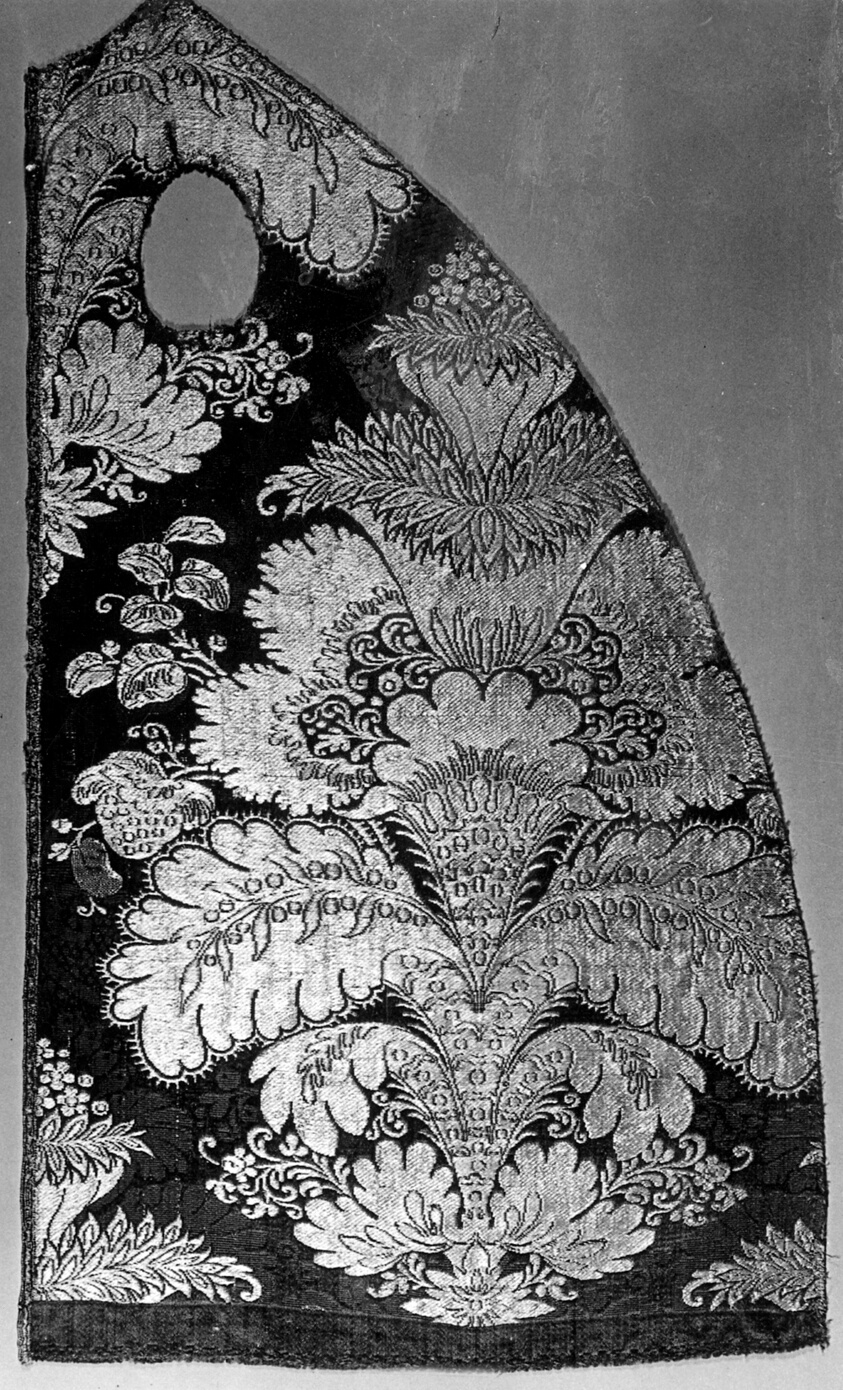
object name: Textile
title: Fragment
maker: France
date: Late 18th/early 19th century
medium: silk, double faced compound weave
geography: France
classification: textile; weaving